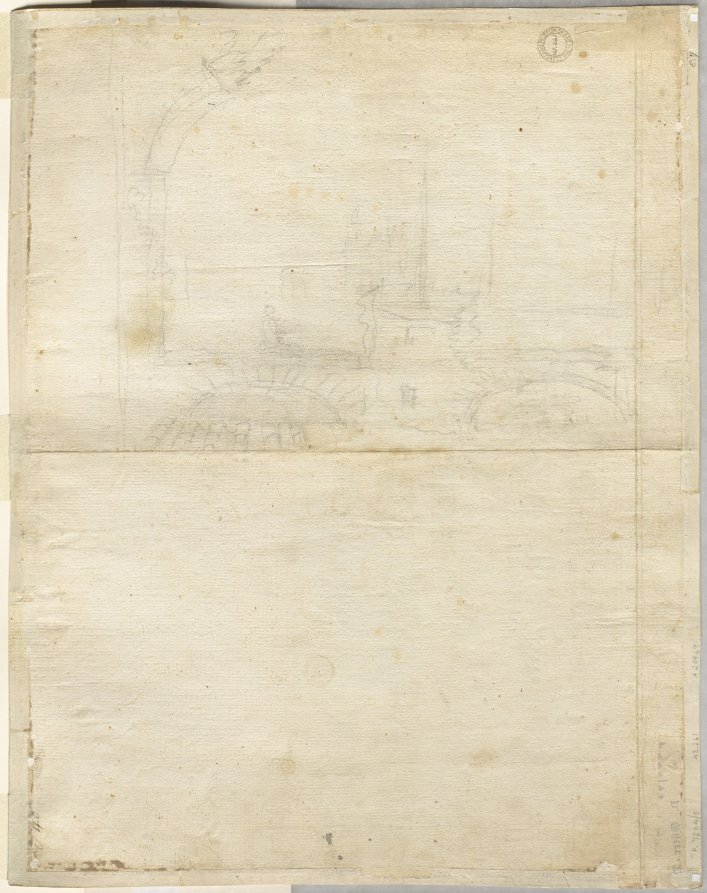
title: Sketch for San Giovanni in Laterano (verso)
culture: Flanders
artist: Lievin Cruyl (Flemish, c. 1640-c. 1720)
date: 1664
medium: graphite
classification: Drawing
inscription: upper right, in brown ink: [2?]S46 [partially masked] ; ON PAPER STRIP MOUNTED TO PERIMETER, lower left, in graphite: A20969 ; lower right, in graphite: E. 7